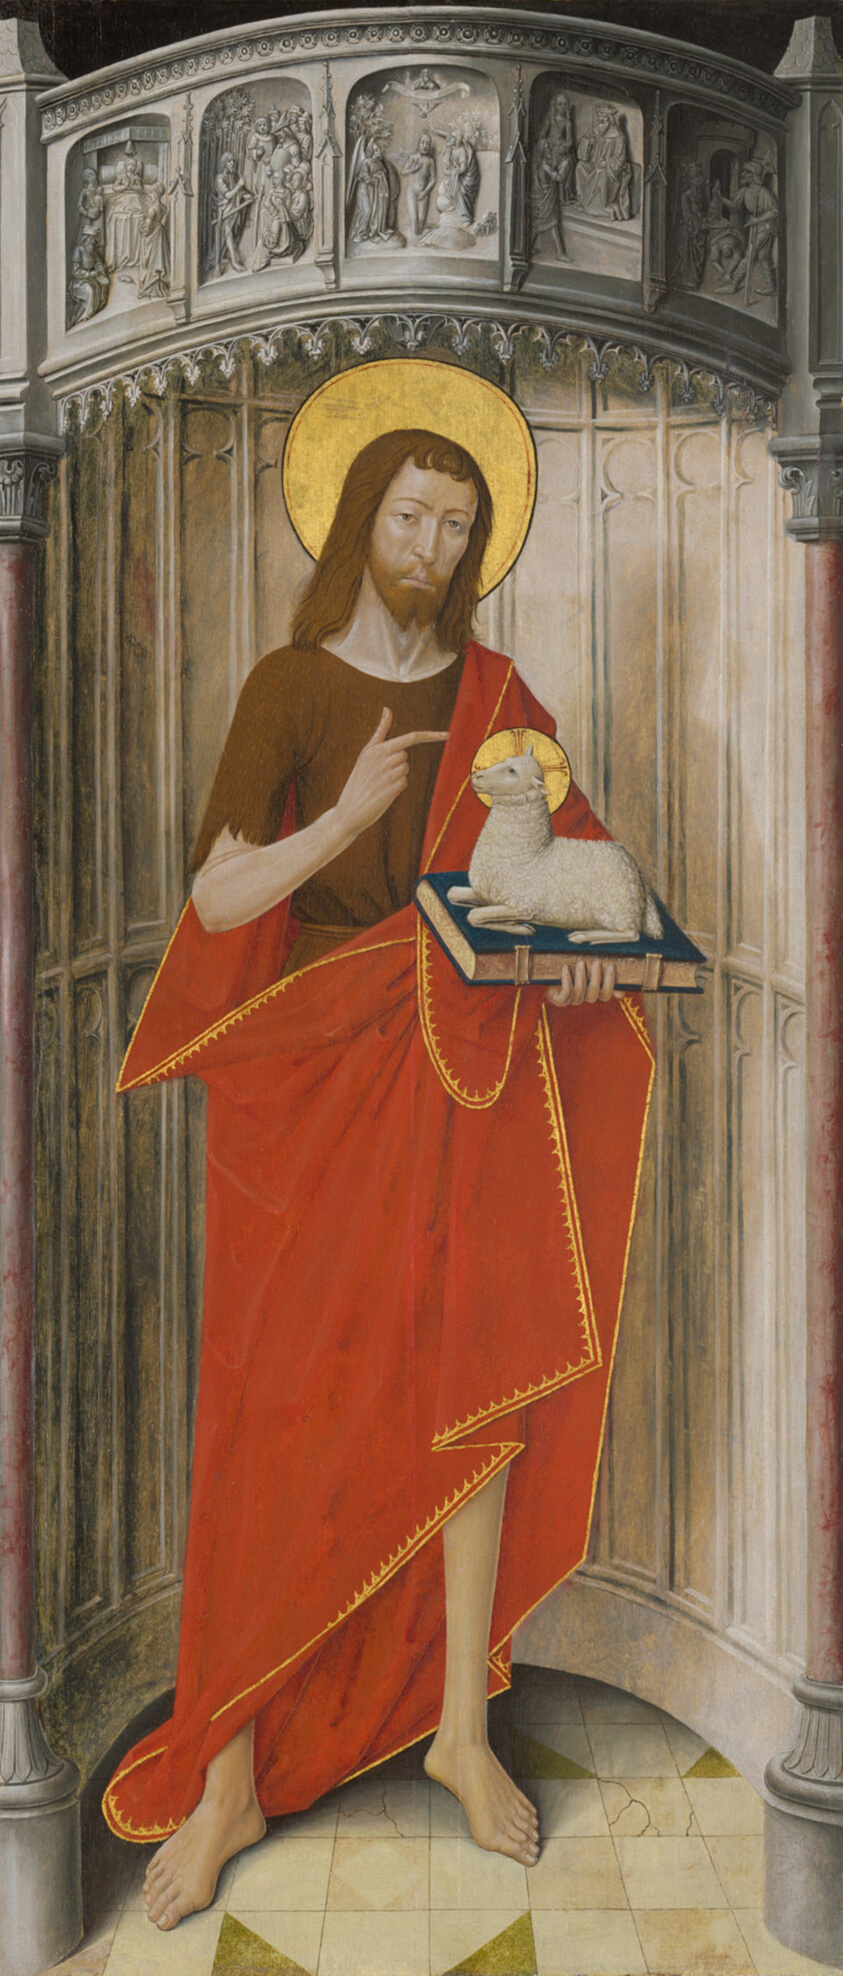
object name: Painting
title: Panels from the High Altar of the Charterhouse of Saint-Honoré, Thuison-les-Abbeville: Saint John the Baptist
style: 15th century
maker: French; Picardy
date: c. 1495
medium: Oil on panel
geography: France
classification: oil on panel; france; french; oil paintings (visual works); painting; european painting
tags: Century of Progress, altar, architechture, architecture, architecture, Christian subjects, Christianity, Devotion, man, religion, religious, religious figures, Saint John the Baptist, sheep, world's fairs, Chicago World's Fairs